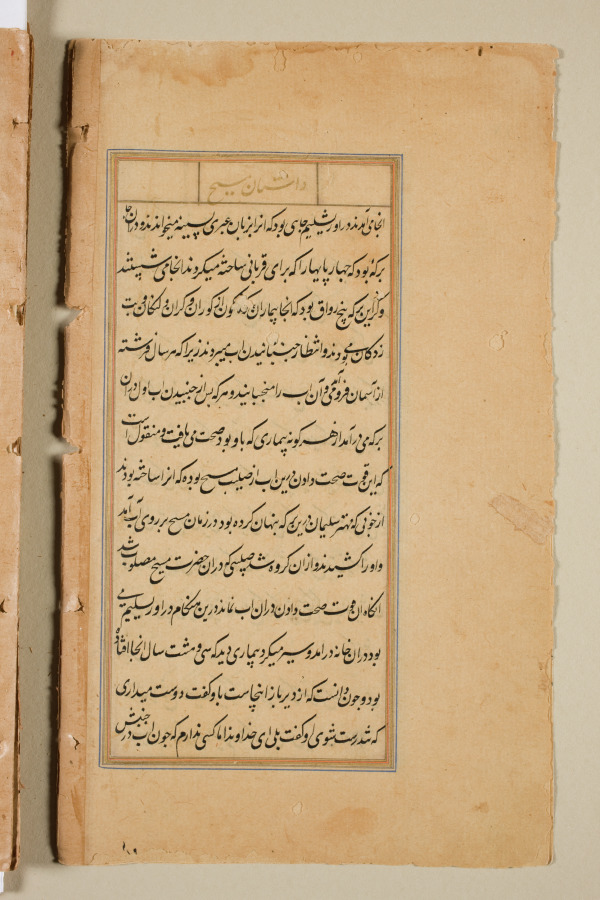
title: Text page from a Mirror of Holiness (Mir’at al-quds) of Father Jerome Xavier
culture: Mughal India, Allahabad, made for Prince Salim (1569–1627)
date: 1602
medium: Ink and gold on paper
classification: Manuscript